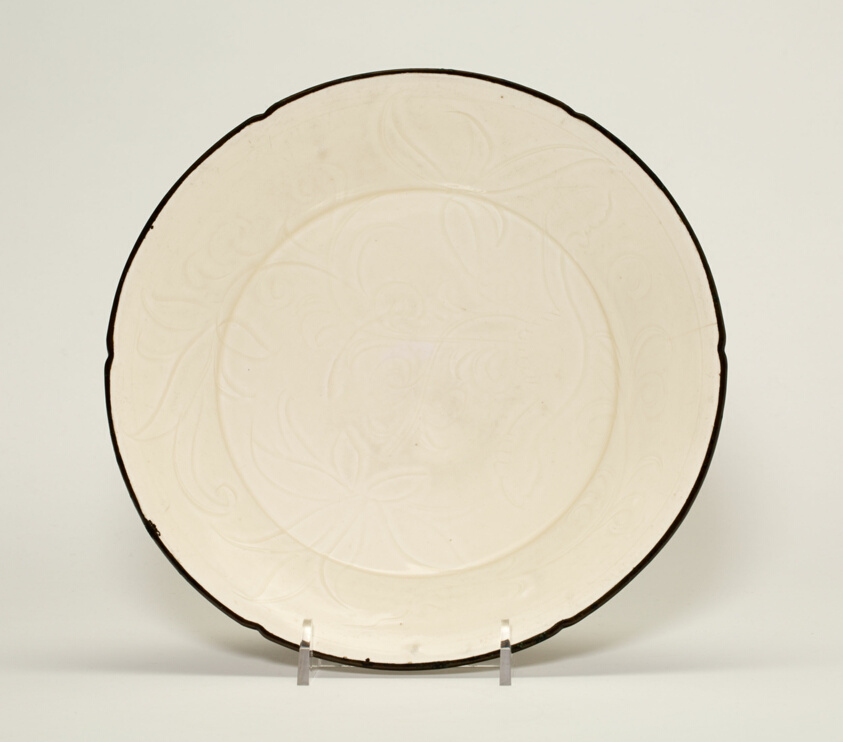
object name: Vessel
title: Dish with Lotus Flowers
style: Chinese (culture or style)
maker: China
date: Song dynasty (960–1279)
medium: Ding ware; porcelain with underglaze carved decoration; metal rim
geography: China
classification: dish (vessel); asian art; ceramics; vessel